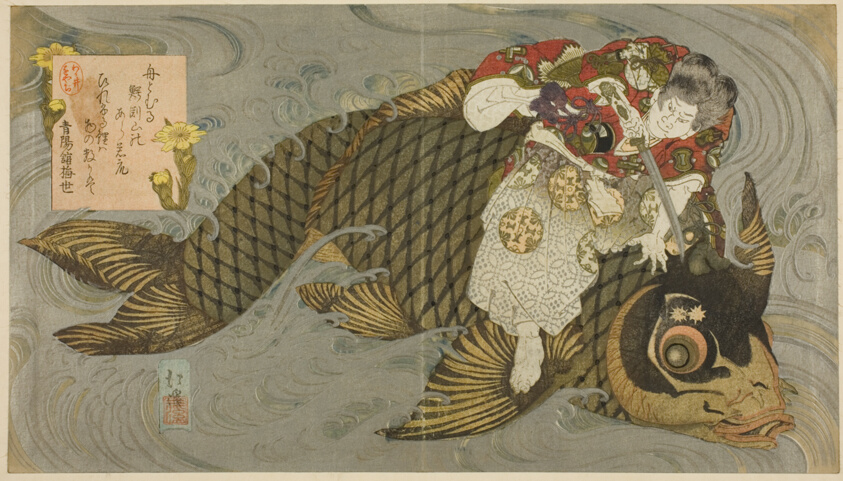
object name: Print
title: Oniwakamaru subduing the giant carp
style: Japanese (culture or style)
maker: Totoya Hokkei (Japanese, 1780–1850)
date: c. 1830/35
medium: Color woodblock print; shikishiban diptych, surimono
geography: Japan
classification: woodblock print; print; asian art